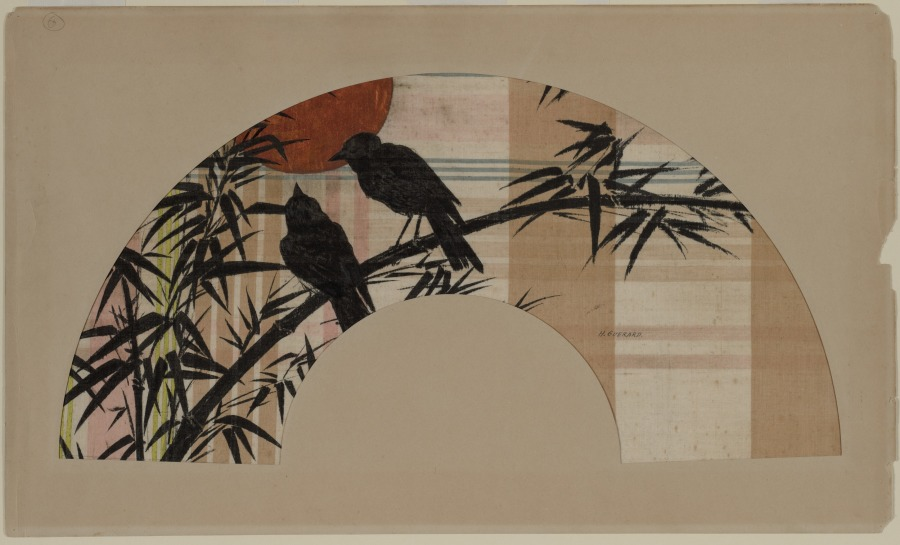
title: Fan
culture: France, 19th century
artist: Henri Charles Guérard (French, 1846–1897)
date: c. 1890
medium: black ink, watercolor, and tinted metal leaf on patterned fabric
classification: Drawing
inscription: signed in ink